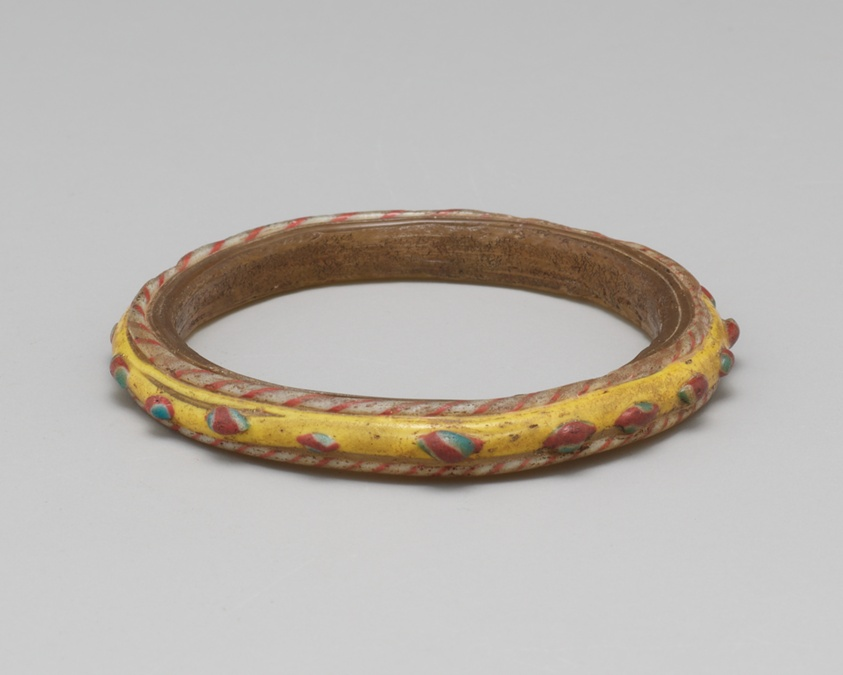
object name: Costume and Accessories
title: Bracelet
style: Islamic (culture or style)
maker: Islamic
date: 14th-15th century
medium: Glass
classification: glass; jewelry; ancient art; costume